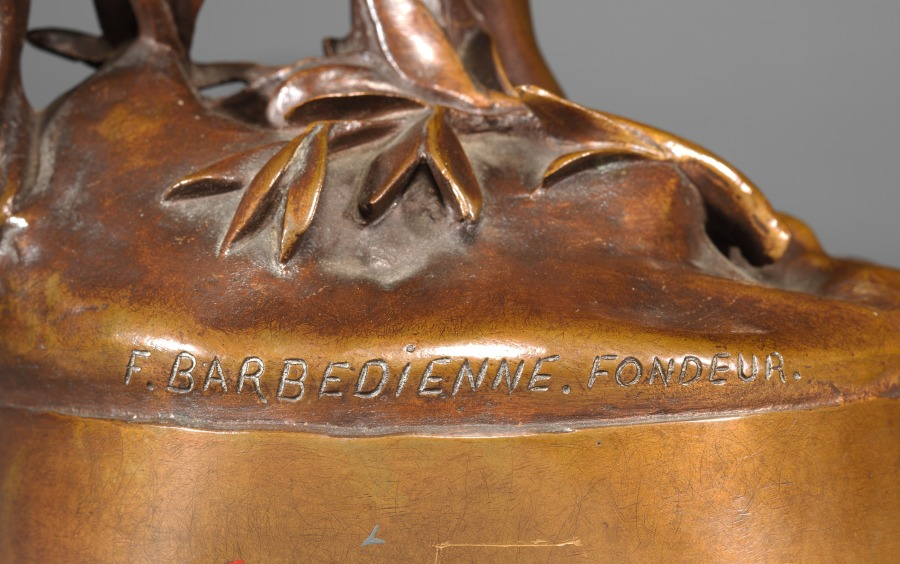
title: Gloria Victis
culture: France, 19th century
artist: Antonin Mercié (French, 1845–1916)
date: c. 1880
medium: bronze with gilding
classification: Sculpture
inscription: Signed near foot at right: "A. MERCIE."; inscribed rear: "F. BARBEDIENNE. FONDEUR."; inscribed front of base: "GLORIA VICTIS."